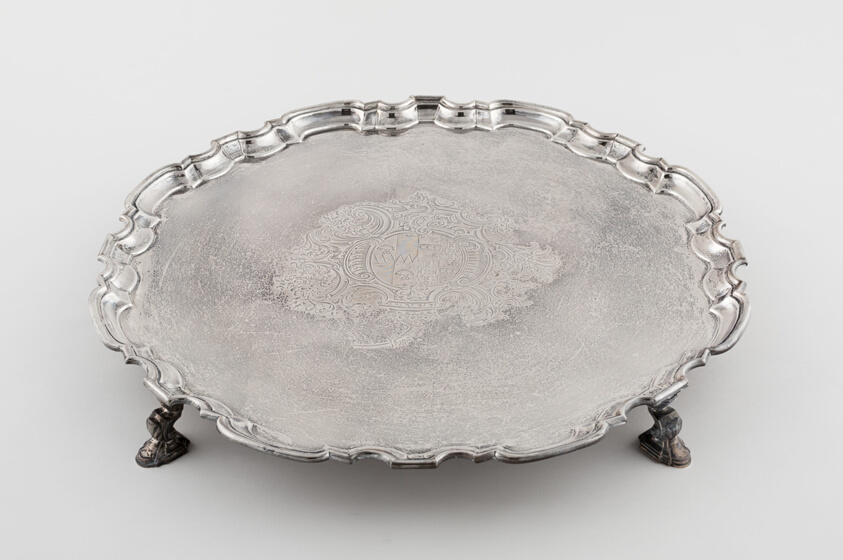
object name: Metalwork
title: Tray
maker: John Tuite; English, active 1710-20; London, England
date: 1731/32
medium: Silver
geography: London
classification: silver; metalwork; european decorative arts